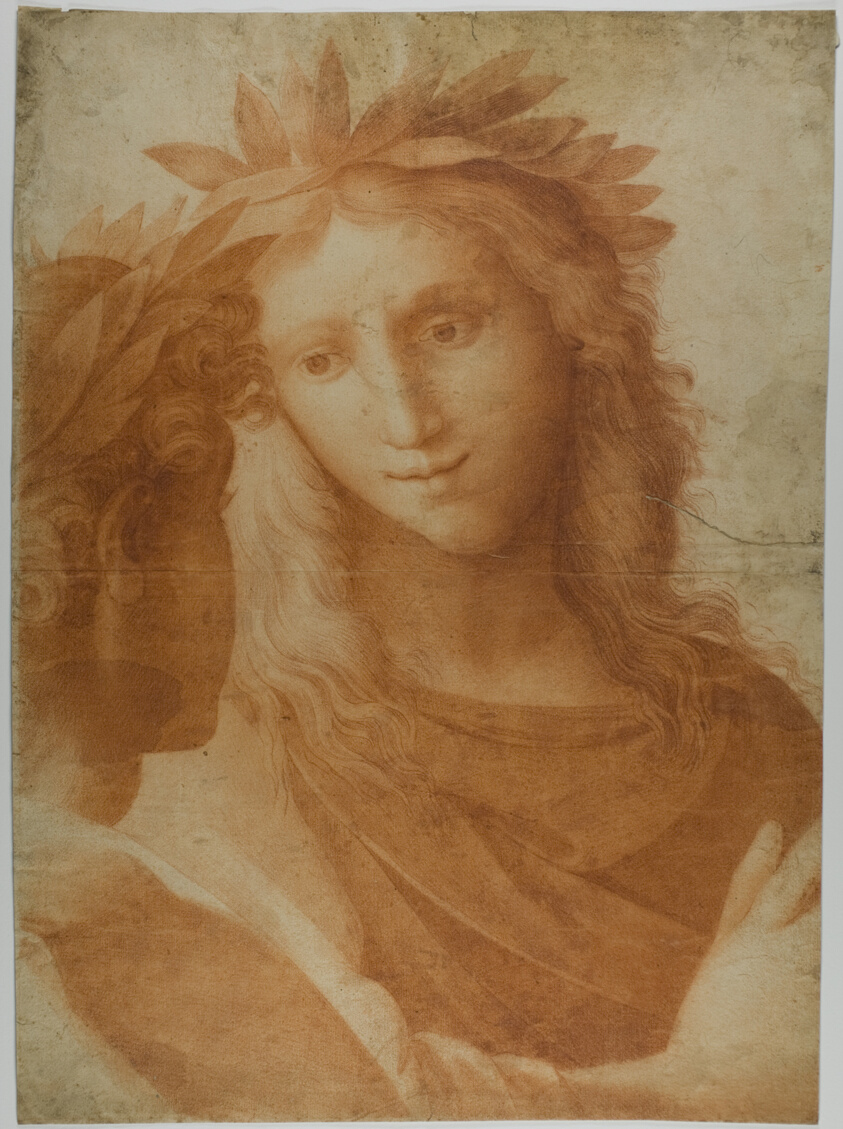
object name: Drawing and Watercolor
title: Man and Woman Crowned with Laurel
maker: after Raffaello Sanzio, called Raphael; Italian, 1483-1520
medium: Red chalk on cream laid paper, laid down on ivory laid paper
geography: Italy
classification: chalk; drawings (visual works); prints and drawing